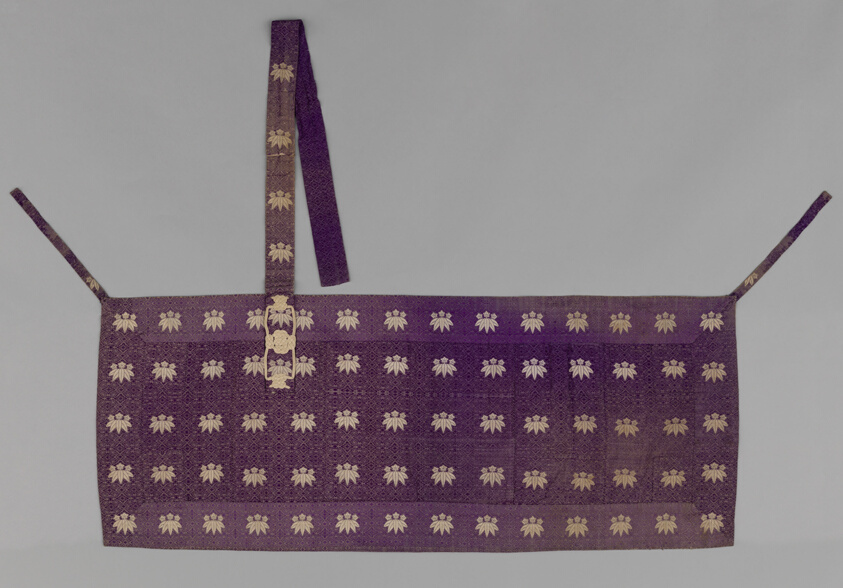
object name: Textile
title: Kesa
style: late edo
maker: Japan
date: late Edo period (1789–1868), 1800/68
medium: Kesa: Silk and cotton; warp-float faced 2:1 ‘z’ twill weave with supplementary patterning weft floats and some supplementary wefts bound in weft-float faced 1:2 ‘s’ twill interlacings Cords: Silk, 2:2 twill square braiding; knotted Lining: Silk 5:1 twill damask weave; inscribed with India ink (sumi)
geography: Japan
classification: textile; weaving; liturgical - buddhist